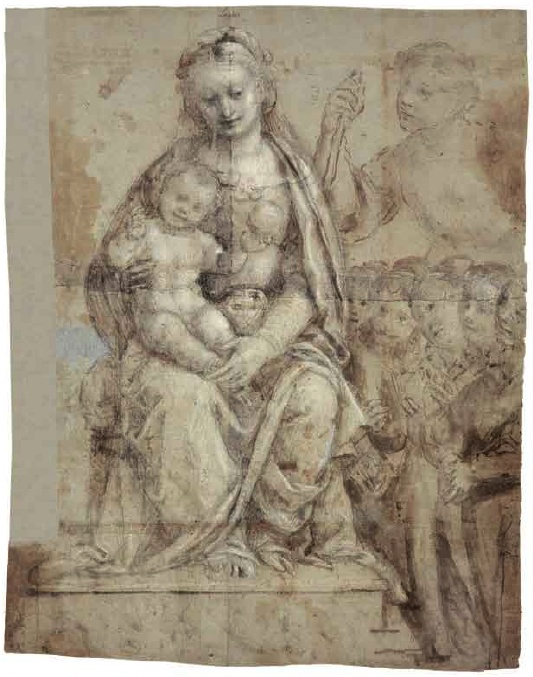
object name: Drawing and Watercolor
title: Madonna and Child, a Warrior Saint (Michael?), and a Group of Worshippers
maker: Bernardino Lanino (Italian, c. 1509-after 1581)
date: 1565/70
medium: Brush with brown and black ink and brown wash, black chalk, heightened with white, on multiple sheets of pieced, blue laid paper (now discolored).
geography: Italy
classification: drawings (visual works); paper; chalk; brush and wash; brush and ink; prints and drawing